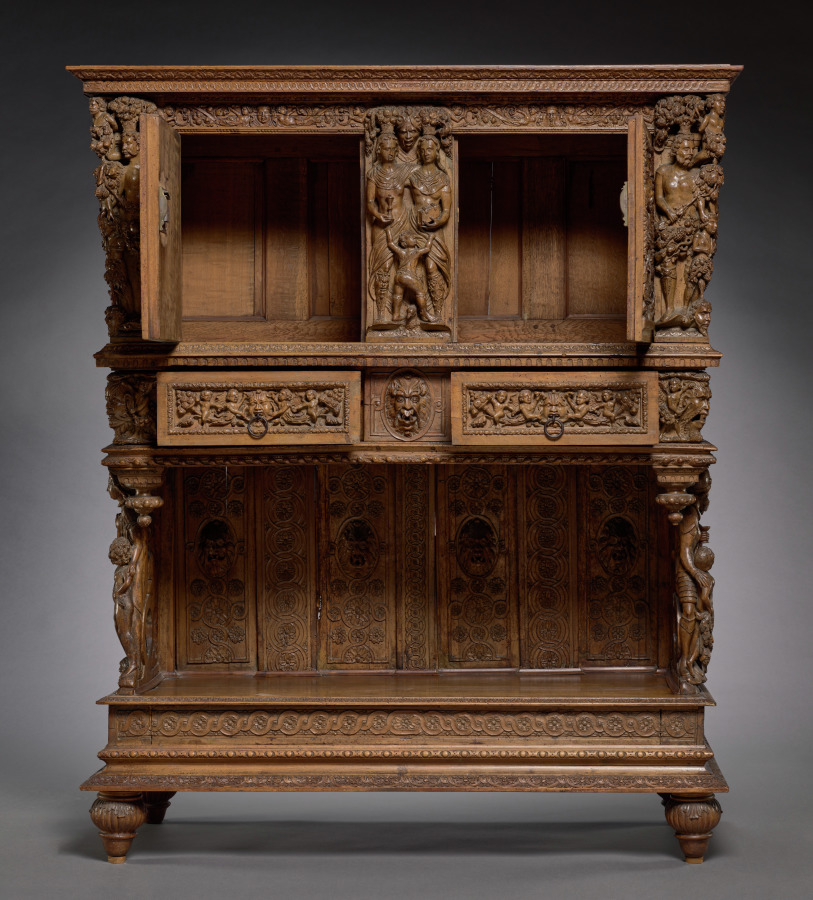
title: Dressoir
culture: France, Burgundy, 16th century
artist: style of Hugues Sambin (French, 1518–c. 1601)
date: mid 1500s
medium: walnut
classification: Furniture and woodwork